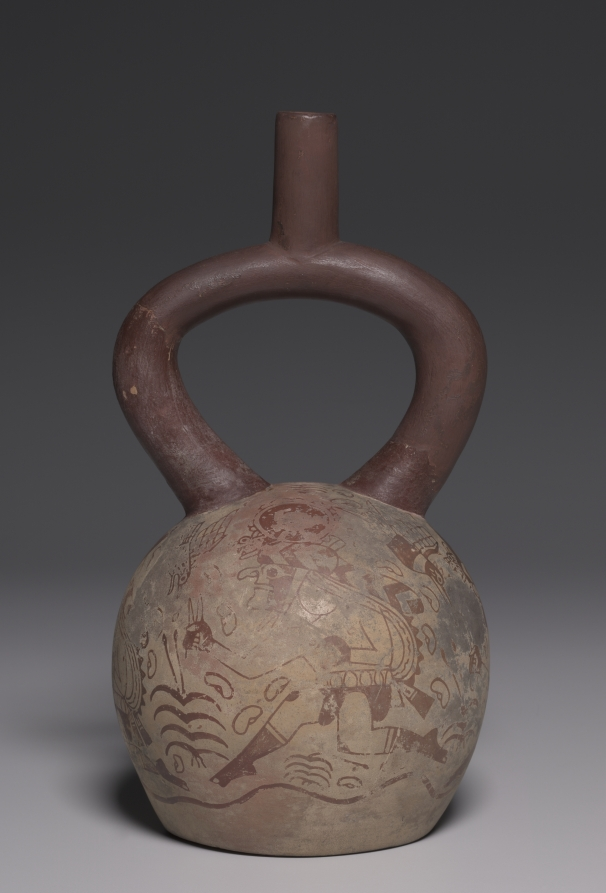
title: Vessel with Running Figures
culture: Peru, North Coast, Moche style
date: 450–550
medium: earthenware with colored slips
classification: Ceramic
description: Moche painters were masters at capturing the peak of physical activity. On this vessel are runners whose legs seem to churn so fast they ripple the desert groundline. Such runners, common in Moche art, always carry small bags, the contents open to question. But beans sometimes float around the runners, as here, suggesting they are involved in a ritual for planting. Beans also may have been used in rituals to divine the unknown.